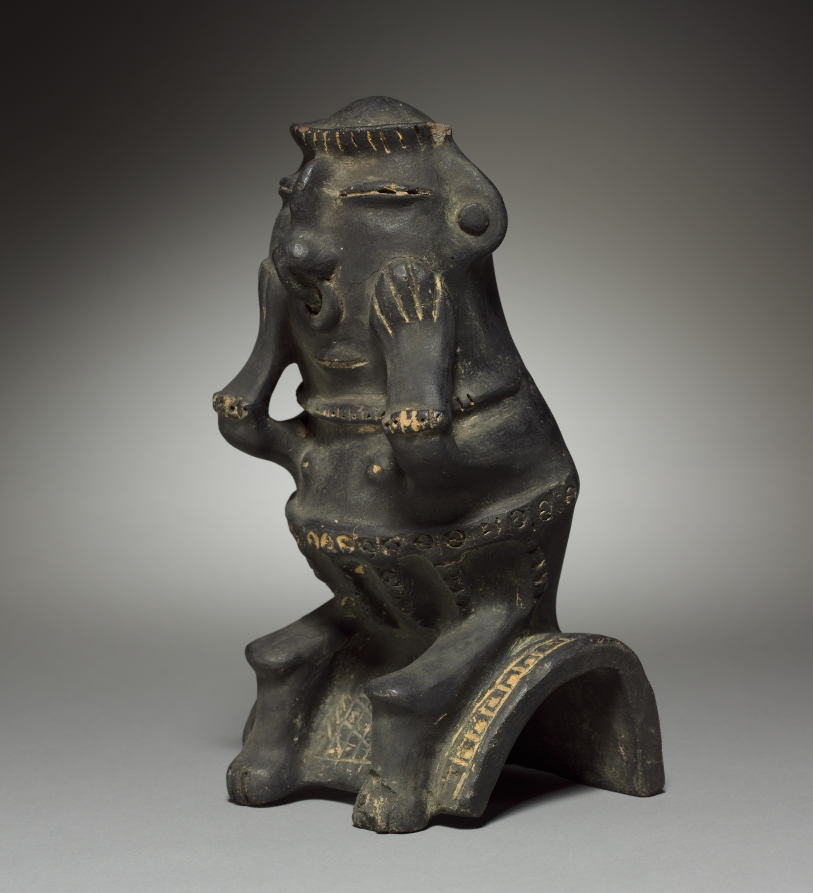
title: Seated Figure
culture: Colombia, Pre-Columbian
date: before 1921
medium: earthenware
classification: Ceramic